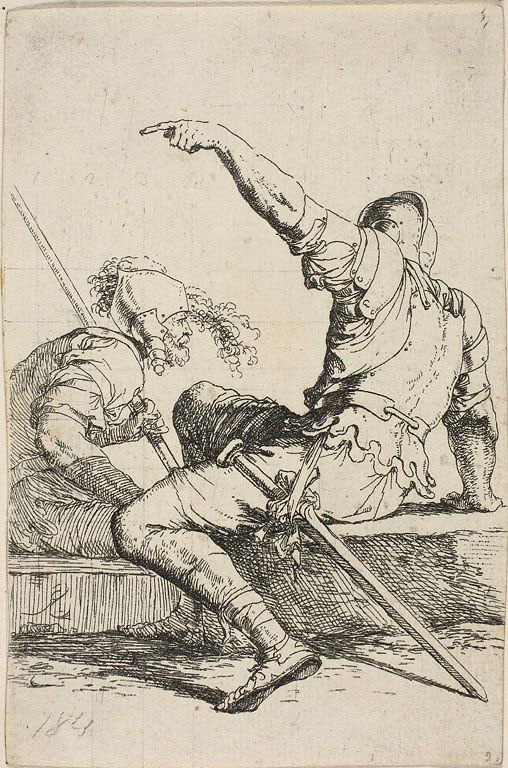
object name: Print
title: Two Warriors Seated on Low Rocks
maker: Salvator Rosa (Italian, 1615-1673)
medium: Etching on ivory laid paper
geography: Italy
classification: etching; print; prints and drawing